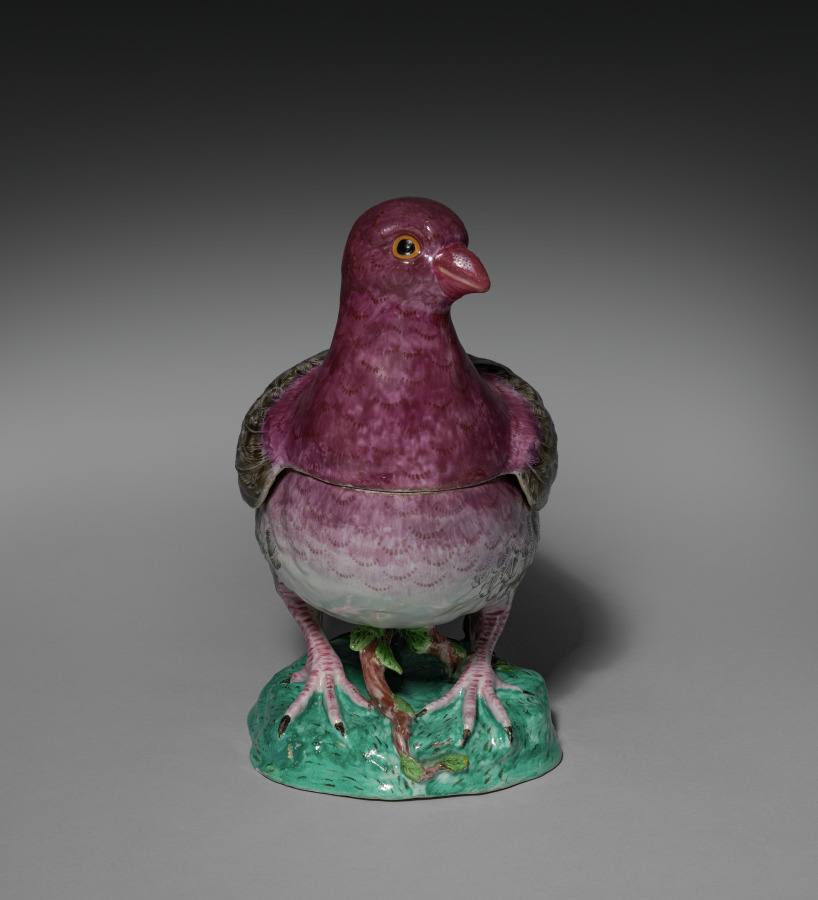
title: Covered Tureen in the Form of a Pigeon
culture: France, 18th century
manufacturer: Sceaux Factory (French, active 1748–66)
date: c. 1760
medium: Tin- glazed earthenware (faience) wth enamel decoration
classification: Ceramic